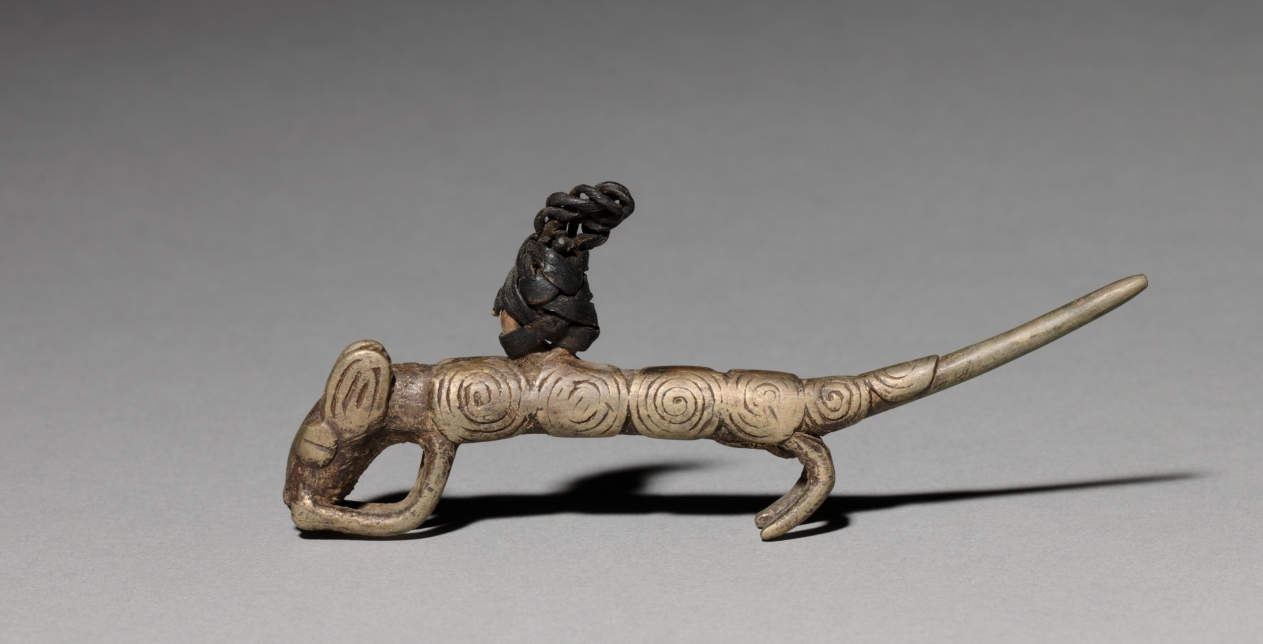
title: Animal Pendant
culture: Africa, West Africa, Burkina Faso, Tusyan-style maker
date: 1900s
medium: Copper alloy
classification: Jewelry